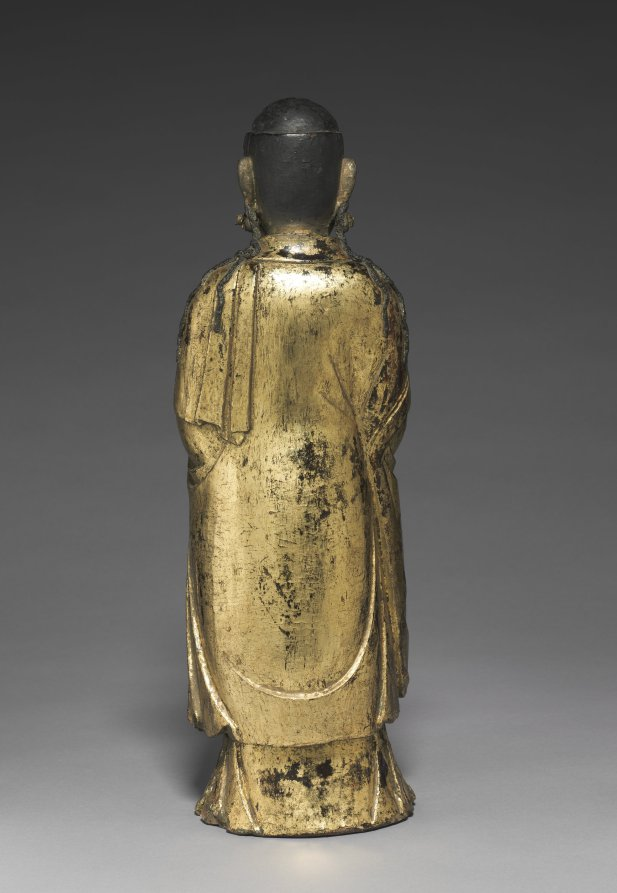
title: Standing Bodhisattva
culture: Korea, Joseon dynasty (1392–1910)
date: 1500s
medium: wood with lacquer and gold, and metal earrings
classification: Sculpture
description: This work demonstrates the enduring presence of Buddhism and its religious practice during the Joseon dynasty (1392–1910) even after Neo-Confucianism, a revised form of Confucianism that emphasized self-cultivation as a path to the formation of a harmonious society and state, became the state religion. Because of its missing crown, it is hard to identify what Buddhist deity this statue represents. But there is no doubt it still can be attributed to a bodhisattva (meaning “enlightened being”) for its iconographic attributes: elaborate jewelry and a lock of long hair.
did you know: This Buddhist statue is missing its crown, which makes it hard to identify what deity it represents.